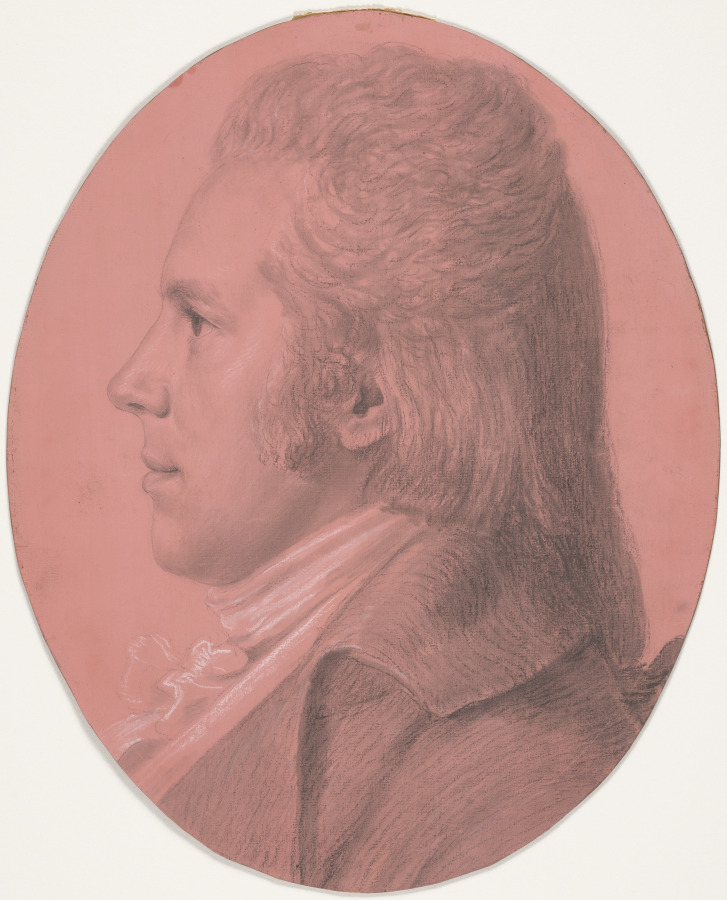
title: Portrait of Georges Arnold Fitzwilliam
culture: France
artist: Charles Balthazar Julien Fevret de Saint-Mémin (French, 1770–1852)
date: c. 1790–1852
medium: Black and white chalk on buff paper with pink wash in original frame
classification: Drawing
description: This portrait and its pair (2024.35.2), depict George Fitzwilliam, an English merchant, and his American wife Eleanor Ramsay Fitzwilliam, who sat in New York for the French émigré artist Charles Balthazar Julien Févret de Saint-Mémin. Saint-Mémin used a recently invented mechanical device called a physiognotrace to trace accurate profiles of his sitters, which he then completed in black and white chalks. The technology enabled Saint-Mémin to establish a thriving business catering to prominent Americans—including Presidents Washington, Adams, Jefferson, and Madison, Benjamin Franklin, and several Native American chiefs—at a time when he was in exile from the French Revolution. As part of each commission, Saint-Mémin also supplied etchings of the portrait in a reduced size, which could be given as keepsakes to family and friends.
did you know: The physiognotrace device used to create this portrait consisted of a wooden frame within which a sitter posed in profile; the artist then peered through an eyepiece and followed the contour and features of the sitter’s face by maneuvering a graphite pencil attached to the mechanism.